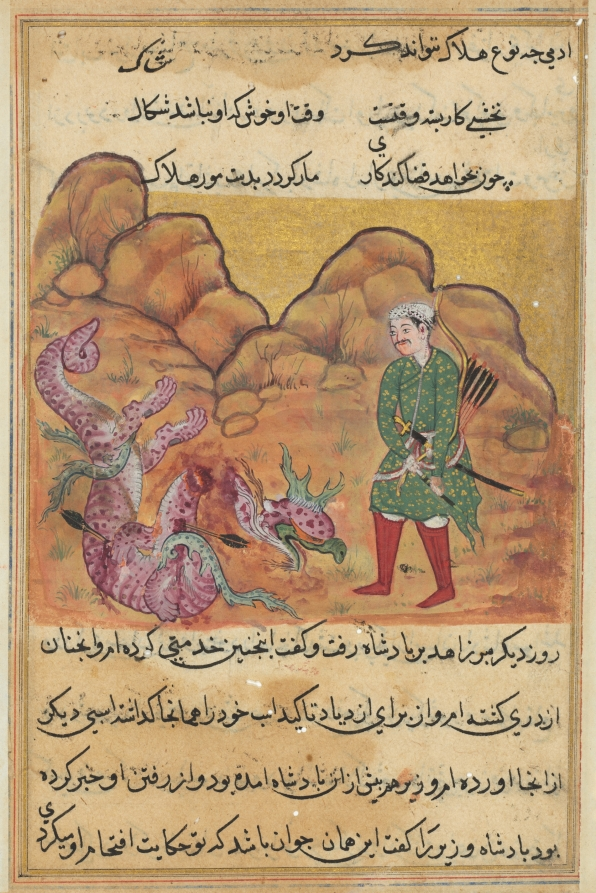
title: The son of the pious man slays the dragon, from a Tuti-nama (Tales of a Parrot): Fifty-second Night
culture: Mughal India, court of Akbar (reigned 1556–1605)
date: c. 1560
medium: gum tempera, ink, and gold on paper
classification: Painting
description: The mangled body of the dragon lies at the young man’s feet. Two poisoned arrows protrude from its side. The man has killed the dragon in hopes of marrying the king’s daughter. Although many warriors and brave men have failed at this task, the young man succeeds with ease.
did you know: The white holes in this page are from insect damage.